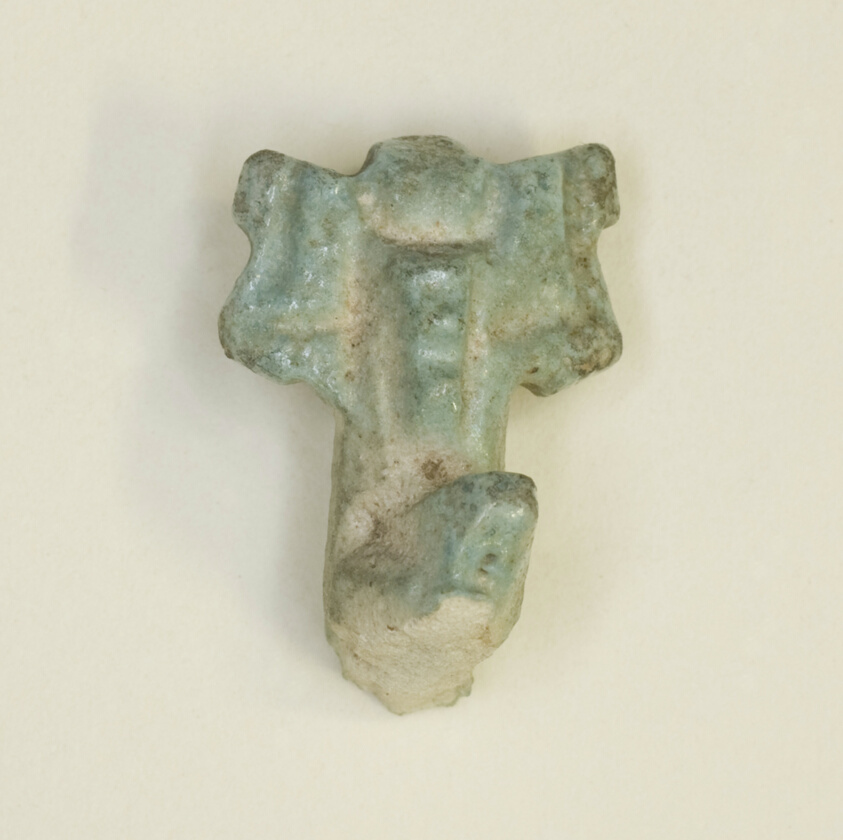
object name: Costume and Accessories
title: Amulet of the God Shu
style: third intermediate period, egyptian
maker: Egyptian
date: Third Intermediate Period, Dynasty 21–25 (1070–656 BCE)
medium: Faience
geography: Egypt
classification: amulet; jewelry; ceramics; ancient art; costume; faïence (composite material)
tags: gods (deities)